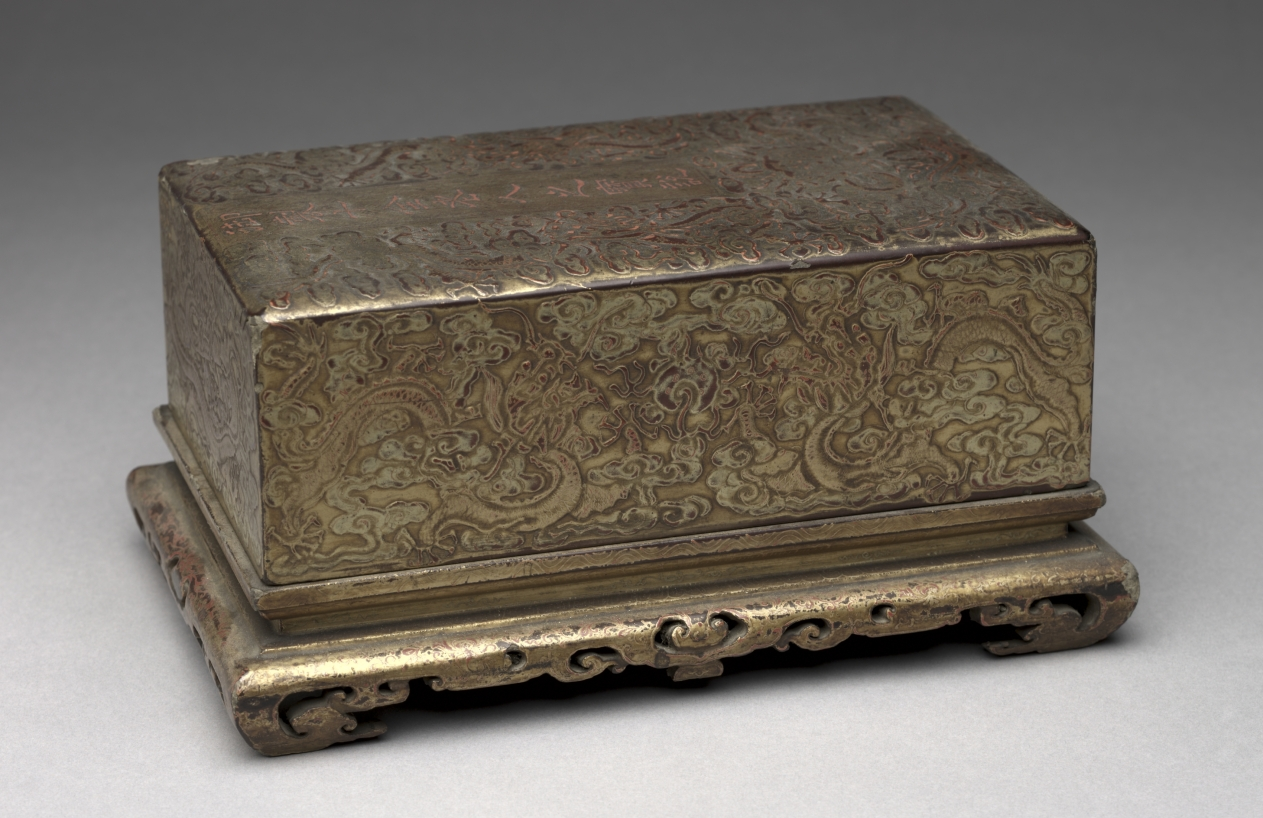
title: Box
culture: China, Qing dynasty (1644-1911)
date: 1750–99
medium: pressed sizing on wood painted with lacquer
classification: Lacquer